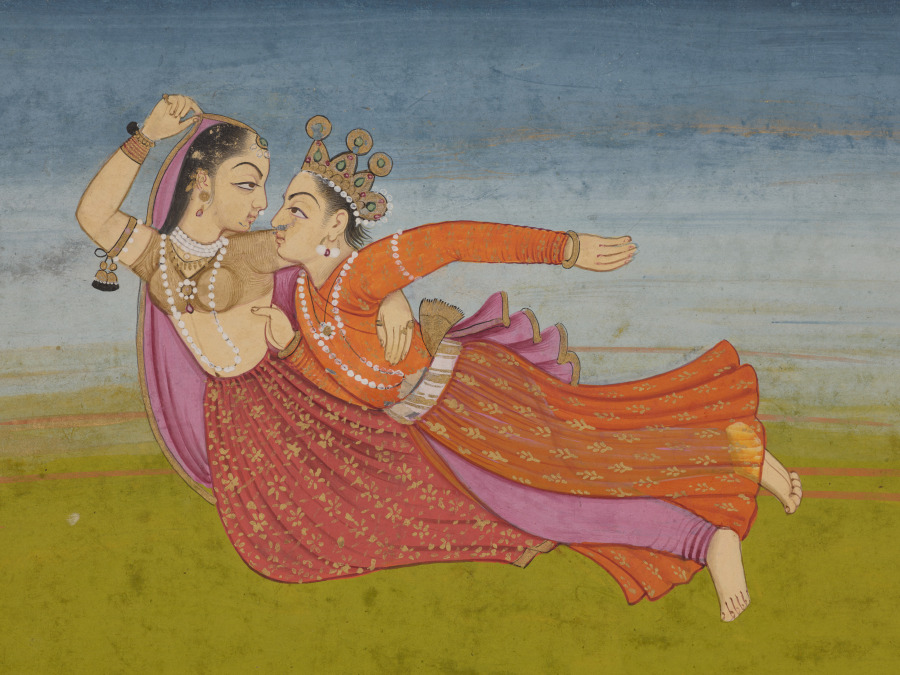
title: Pradyumna and Mayavati Fly to Dvaraka, from the Large Basohli Bhagavata Purana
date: c. 1760–65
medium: Gum tempera, ink, and gold on paper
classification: Painting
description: A goddess who can fly, Mayavati brings her lover Pradyumna to be reunited with his parents for the first time since he was an infant, when he was kidnapped by a demon who was her husband. Having just slain the demon, they can be together and return to the palace where he was born. Pradyumna is the son of Krishna, and also an incarnation of the god of love, Kama. Mayavati is an incarnation of Rati, the goddess of erotic love. Later, Pradyumna also marries his cousin Rukmavati.